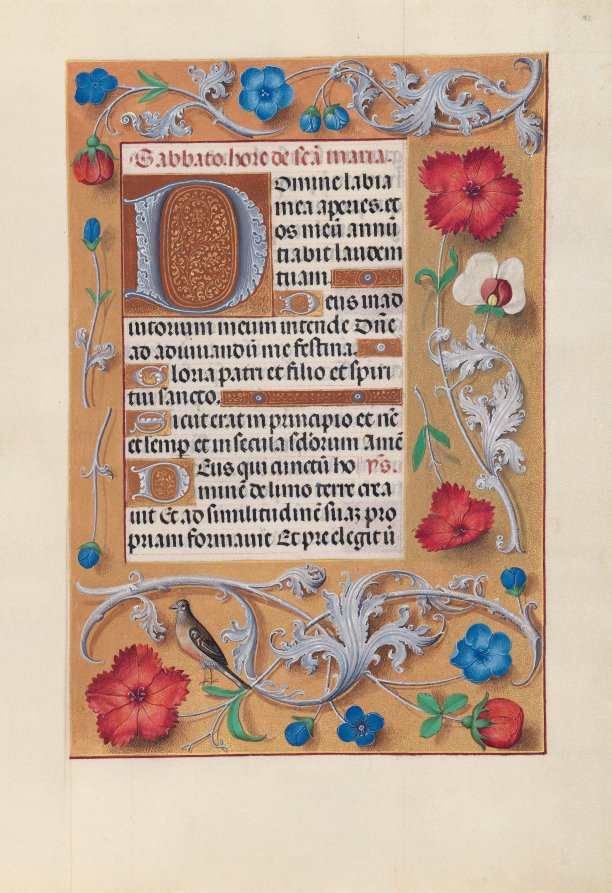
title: Hours of Queen Isabella the Catholic, Queen of Spain: Fol. 81r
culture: Flanders, Ghent and Bruges, late 15th century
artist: Master of the First Prayerbook of Maximillian (Flemish, c. 1444–1519)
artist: and Associates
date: c. 1500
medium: ink, tempera, and gold on vellum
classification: Bound Volume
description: This manuscript was illuminated by a circle of at least five highly organized manuscript painters active in the Flemish cities of Ghent and Bruges. The principal illuminator was Alexander Bening, who painted the majority of the book's miniatures. Manuscripts produced by this circle of artists are renowned for the decoration of their borders, which typically feature a rich variety of realistically-painted flowers, birds, and butterflies. This prayer book, called a book of hours, was intended not for a cleric, but for the private devotions of a lay person-in this case, Isabella the Catholic, Queen of Spain (1451-1504). Isabella's coat of arms embellishes the book's frontispiece. It is unlikely that the book was commissioned by the Queen herself; rather, she probably received it as a diplomatic gift from someone courting her patronage, perhaps Cardinal Francisco Jimenez de Cisneros. A Franciscan friar, Jimenez was dependent upon Isabella for his advancement, first to the post of Queen's confessor in 1492, and then to Archbishop of Toledo in 1495.